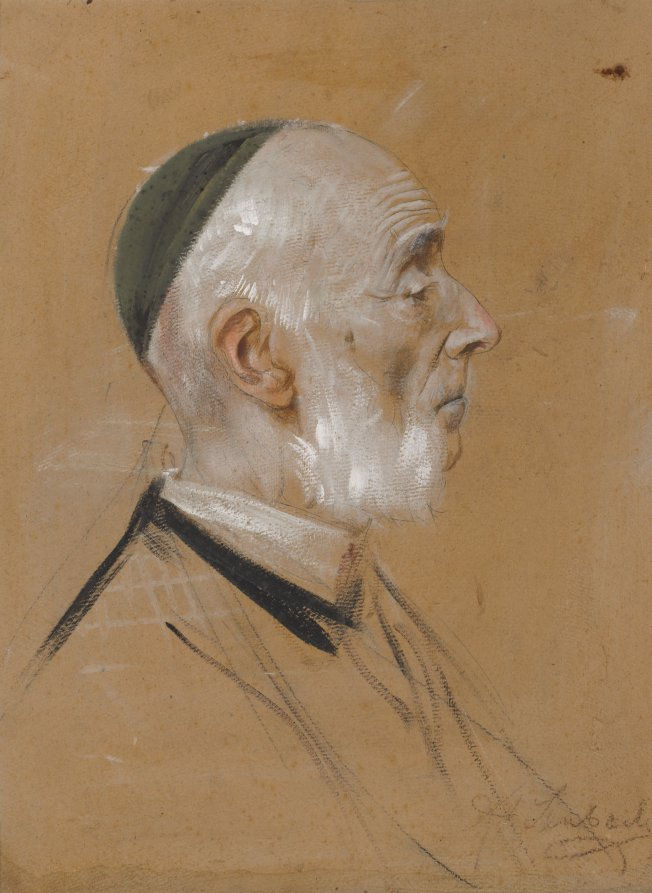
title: Karl Eduard von Liphart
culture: Germany, 19th century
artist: Franz von Lenbach (German, 1836–1904)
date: c. 1875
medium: paint over graphite(?)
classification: Drawing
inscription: signed, lower right, in brown crayon: A. Lenbach ; VERSO OF SECONDARY SUPPORT, upper left, in graphite: [4 lines of illegible script] ; lower center, in blue crayon: 533/2 [upside down]